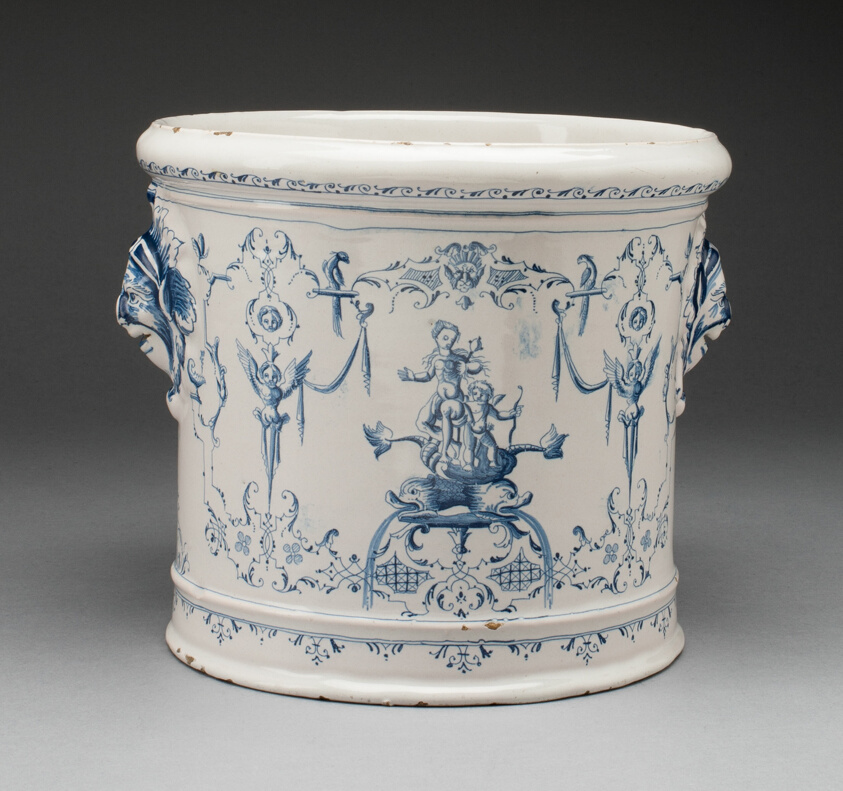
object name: Ceramics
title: Bottle Cooler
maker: Clérissy Pottery Factory; French, late 16th century-1736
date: 1700/1720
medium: Tin-glazed earthenware (faience)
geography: Moustiers-Sainte Marie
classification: tin-glazed ware; ceramics; earthenware; european decorative arts